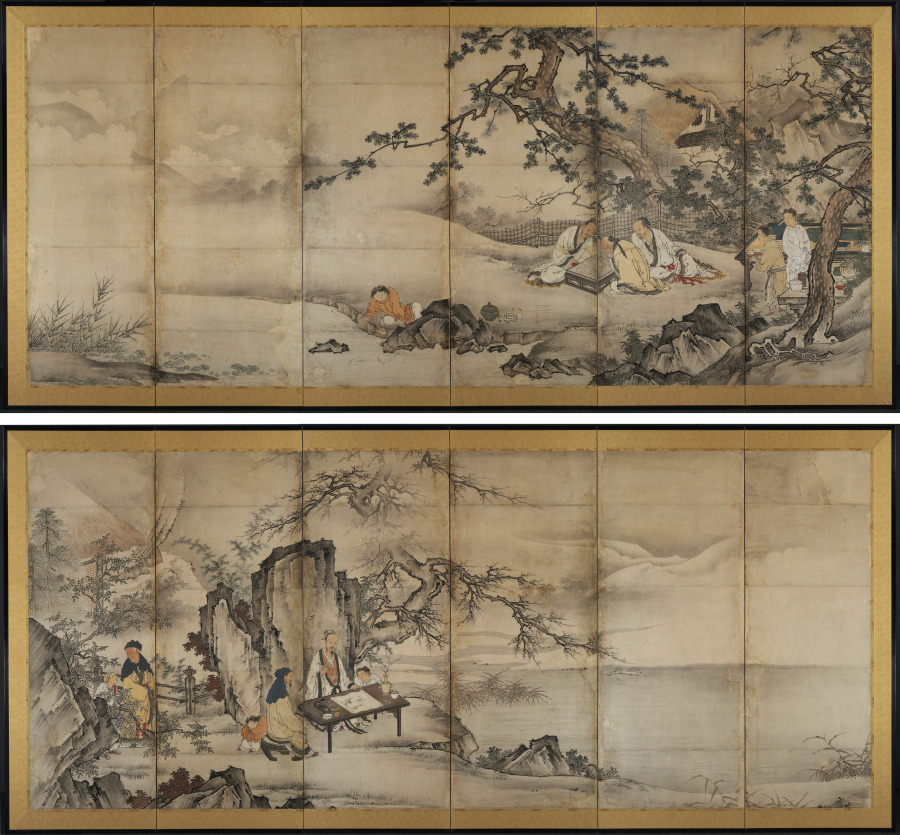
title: The Four Accomplishments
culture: Japan, Momoyama period (1573–1615)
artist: attributed to Kano Shōei (Japanese, 1519–1592)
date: late 1500s–early 1600s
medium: pair of six-panel folding screens; ink and slight color on paper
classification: Painting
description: This pair of screens shows a group of elite Chinese gentlemen and their servants in the countryside. One man is considering his painting in progress, while another looks on as two of his companions play a board game called qi, known in Japan as Go. Nearby is a table set with a selection of books ready to be read and a qin, a type of stringed instrument, still wrapped in its cloth case waiting to be played. The mood is one of enjoyment balanced with formality. Historically, playing the qin and qi along with practicing or admiring calligraphy and painting were considered four skills essential for cultured men in China.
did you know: Another candidate for authorship of these screens is Kano Yukinobu (c. 1513–1575).